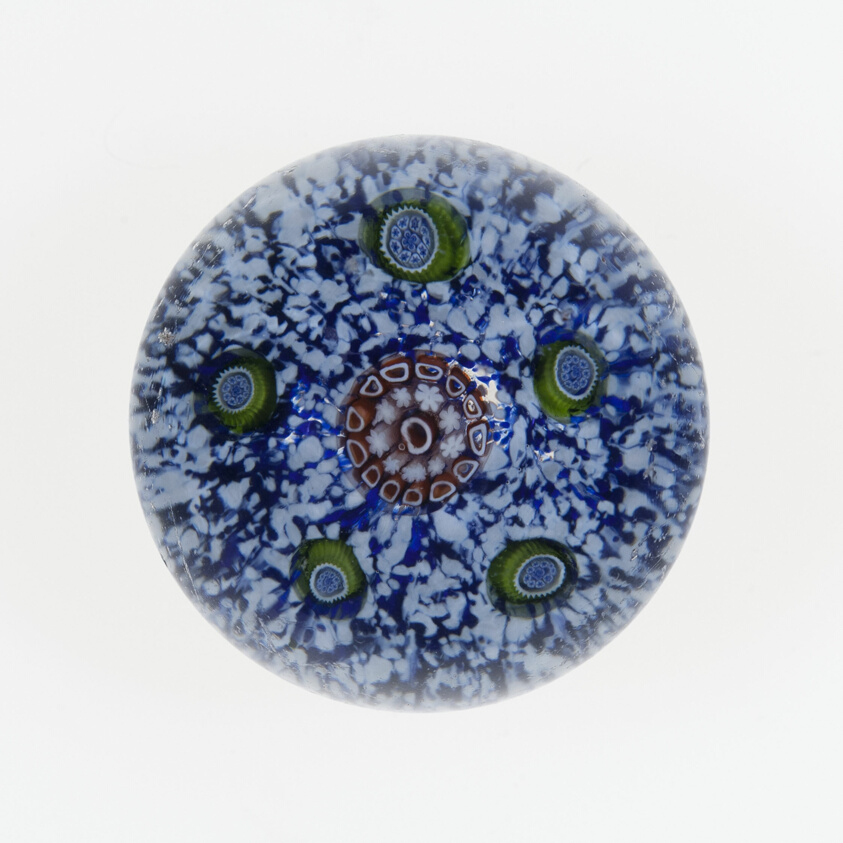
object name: Glass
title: Paperweight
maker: Saint-Louis Glassworks (Cristalleries de Saint-Louis); Lorraine, France, founded 1586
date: c. 1845–60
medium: Glass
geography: Saint-Louis-lès-Bitche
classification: paperweight; glass